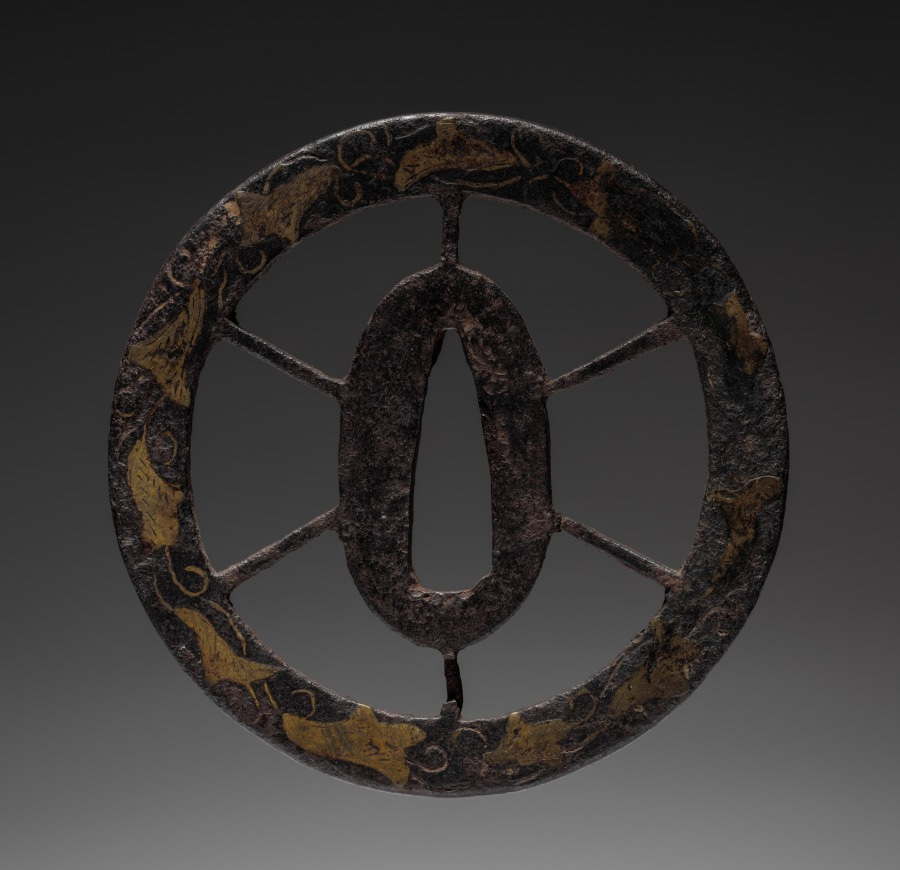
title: Sword Guard (Tsuba)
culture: Japan, possibly Edo period (1615-1868)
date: c. 1615–1868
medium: iron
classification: Arms and Armor